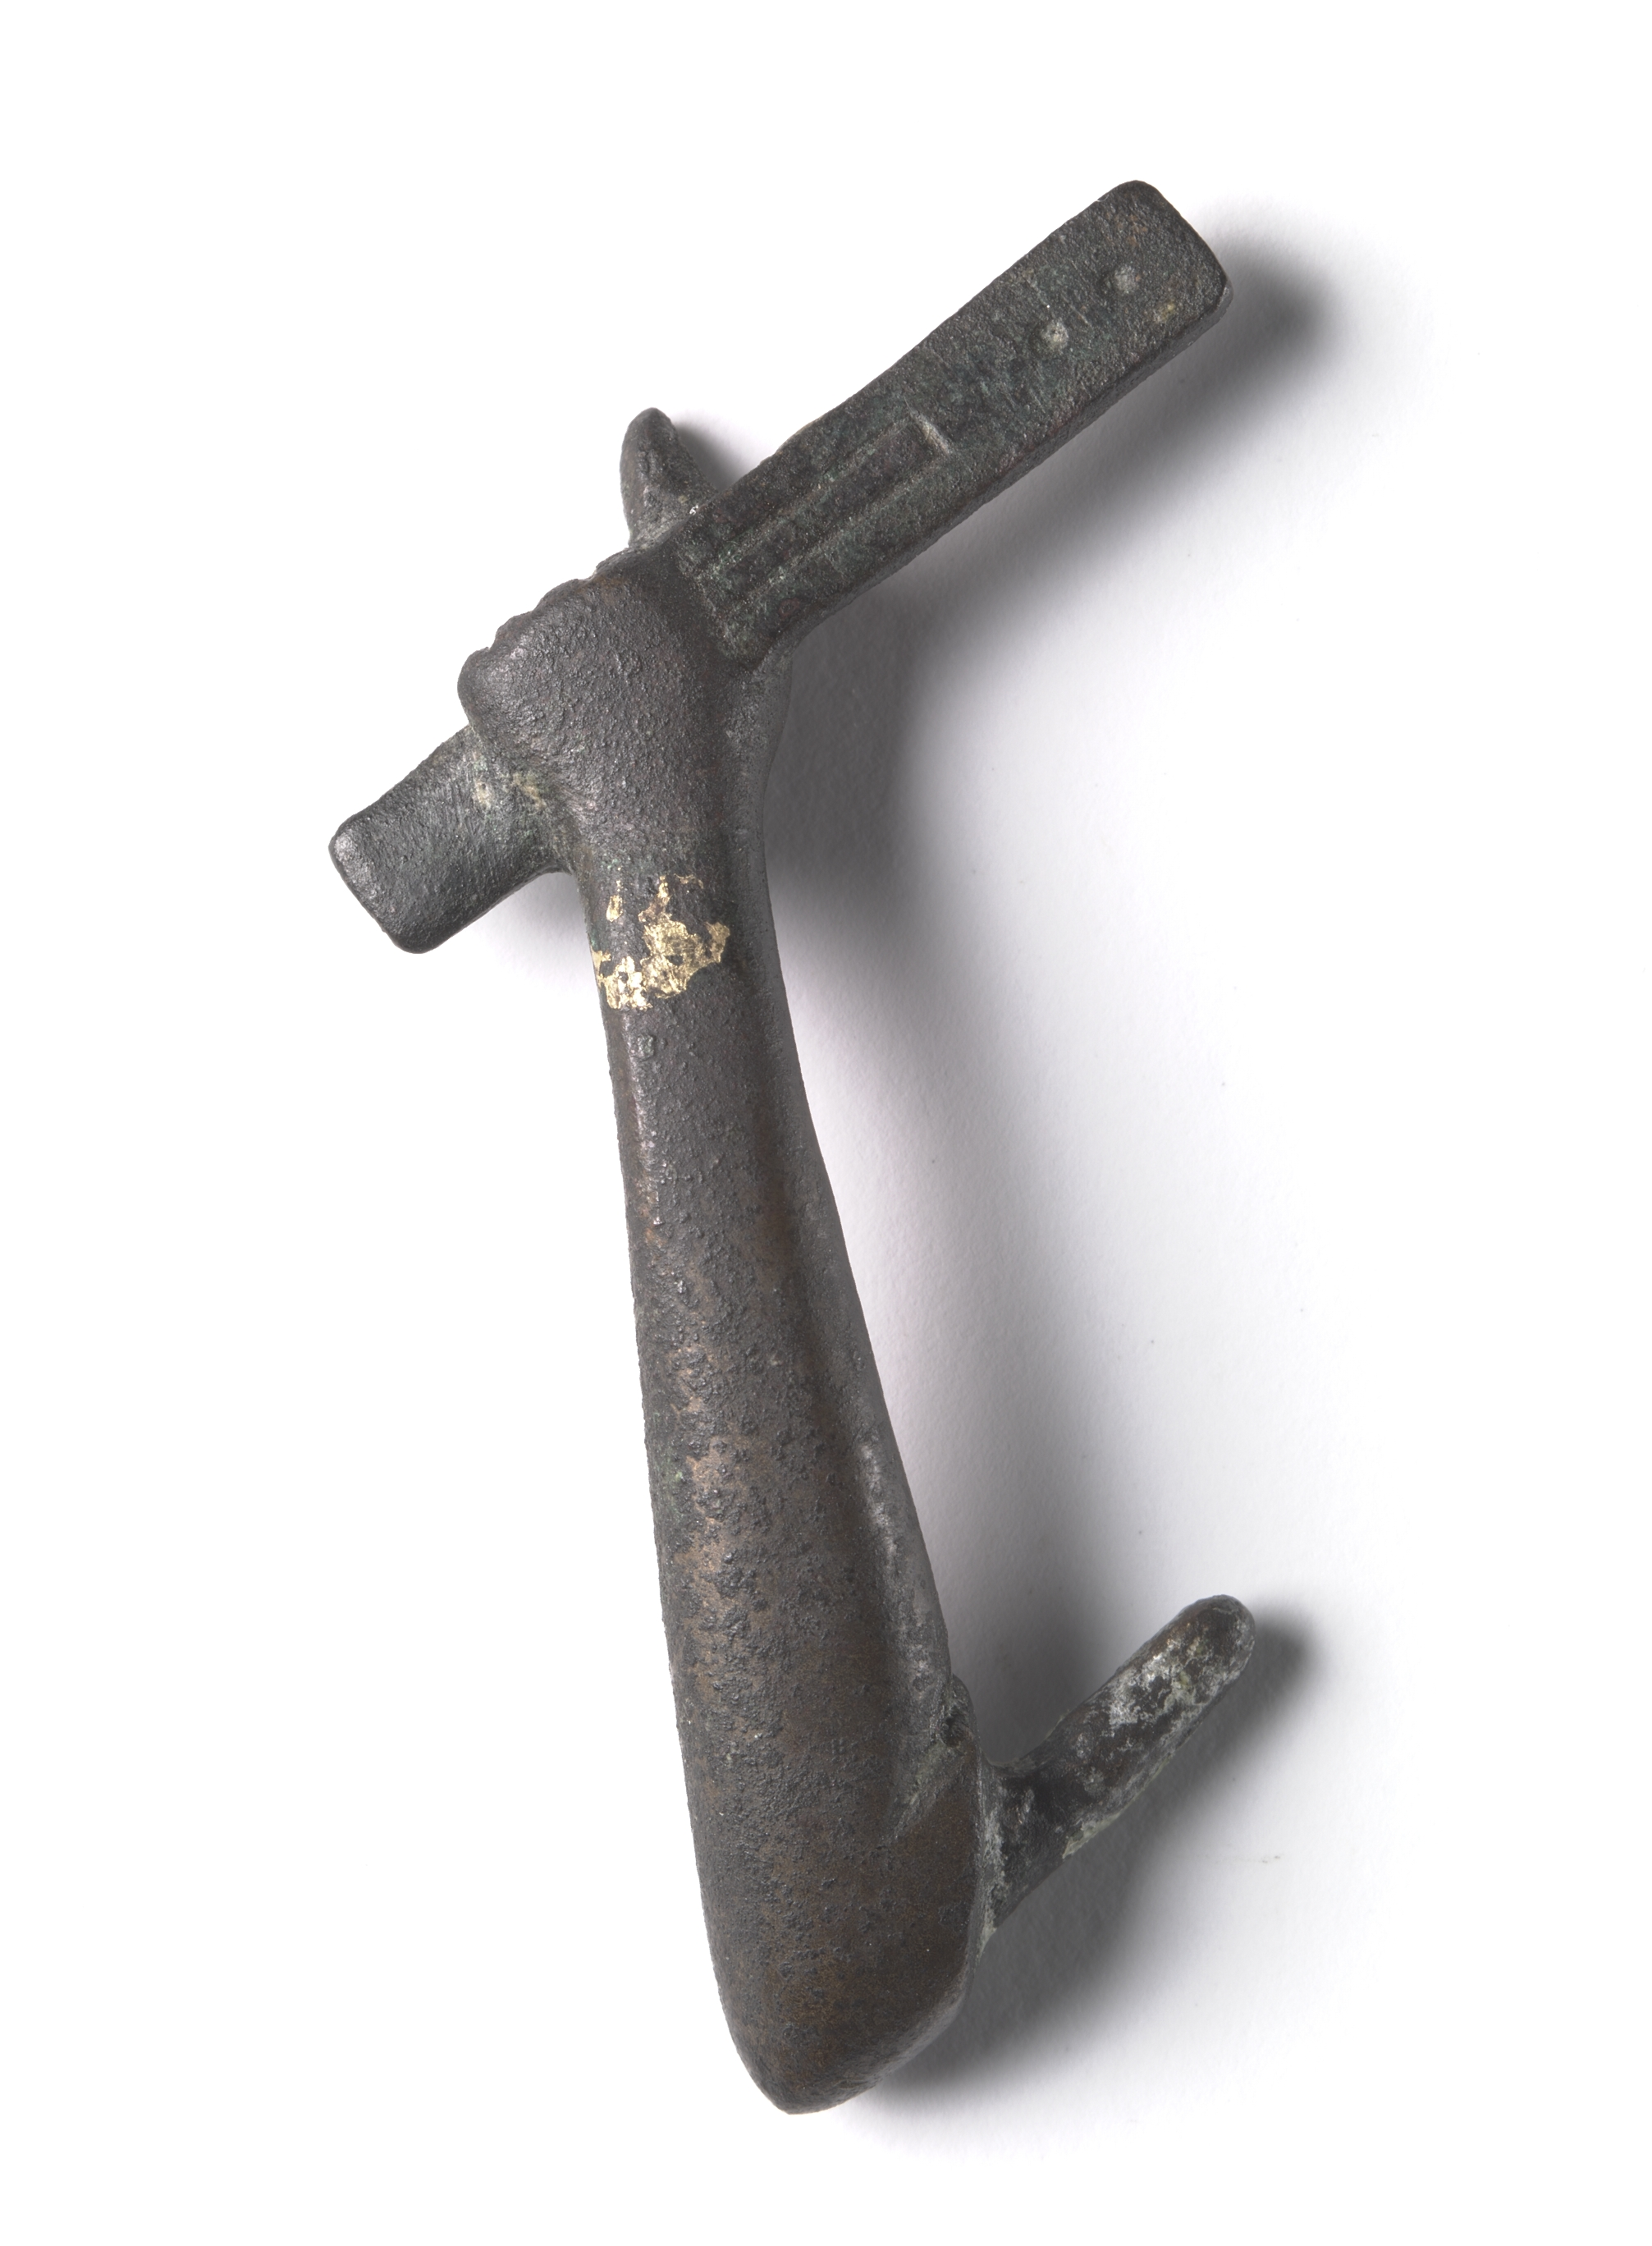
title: Bronze Mount from a "Shawabty Bundle": Left Foot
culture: Egypt, Thebes, Wadi Qubbanet el-Qirud, New Kingdom (1540–1069 BCE), Dynasties 18–19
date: c. 1336–1256 BCE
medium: bronze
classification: Funerary Equipment